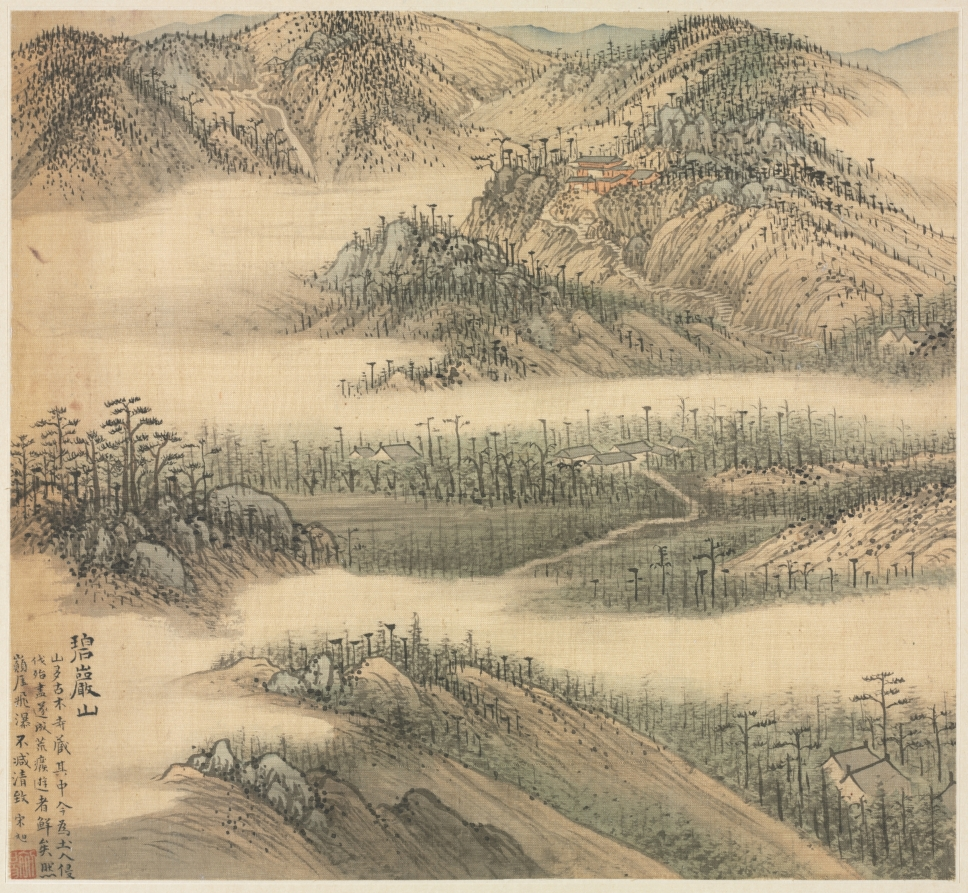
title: Mt. Biyan (Green Cliff)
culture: China, Jiaxing, Ming dynasty (1368–1644)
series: Eighteen Views of Huzhou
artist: Song Xu (Chinese, 1525-c. 1606)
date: c. 1588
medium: Album leaf; ink and color on silk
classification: Painting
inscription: 碧巖山：山多古木，寺藏其中。今為人侵伐殆盡，遂成荒廢，遊者鮮矣。然嶺崖飛瀑，不減清致。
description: This album of landscape paintings depicts the famous scenic areas located in and around the city of Wuxing in southeastern China. These places were all known for their natural beauty, but in addition, a number were distinguished by their links to eminent historical figures and events. The artist, Song Xu, was not a native of Wuxing, but must have visited it when he accepted the commission, for he carefully depicted all eighteen views and wrote comments on each of them. Song's gazetteer-like notation on this leaf reads: Green Cliff Mountain used to have a primeval forest, with a temple hidden within it. Now, those primeval forests have been wantonly and completely cut down. Consequently, with its devastated look, few travelers are coming. Still, with its peaks, cliffs, waterfall, there is no lack of scenic beauty.